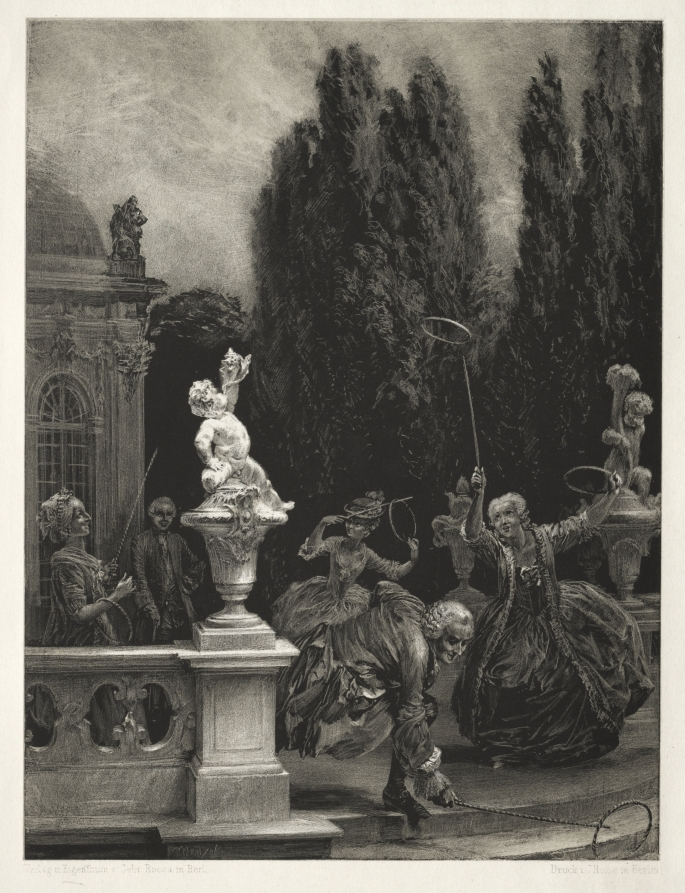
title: Essay on Stone with Brush and Scraper: Playing at Hoops on the Castle Terrace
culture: Germany, 19th century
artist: Adolph von Menzel (German, 1815–1905)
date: 1851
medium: lithograph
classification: Print